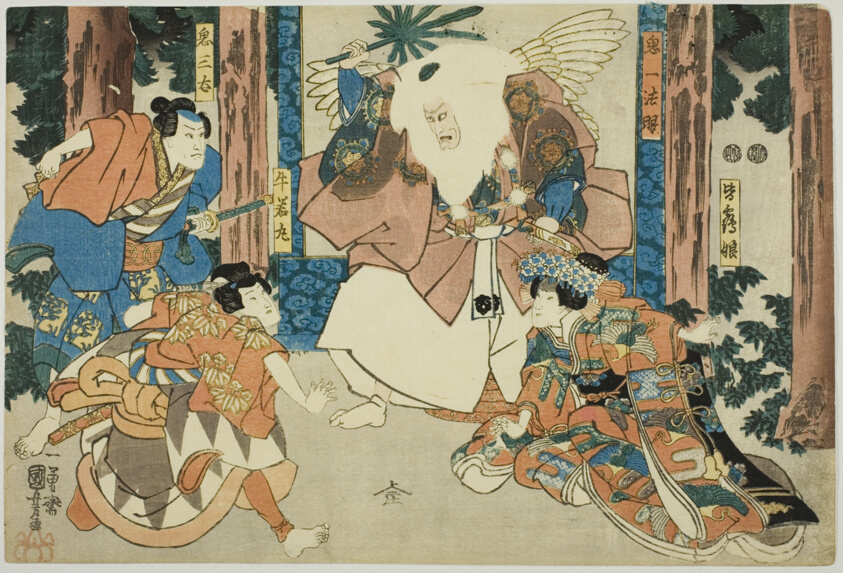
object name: Print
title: Actors as Ushiwakamaru, Kisanta, Kiichi Hogen, and Minazuru-hime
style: Japanese (culture or style)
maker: Utagawa Kuniyoshi (Japanese, 1797-1861)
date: c. 1847/52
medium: Color woodblock print; oban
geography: Japan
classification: woodblock print; print; asian art